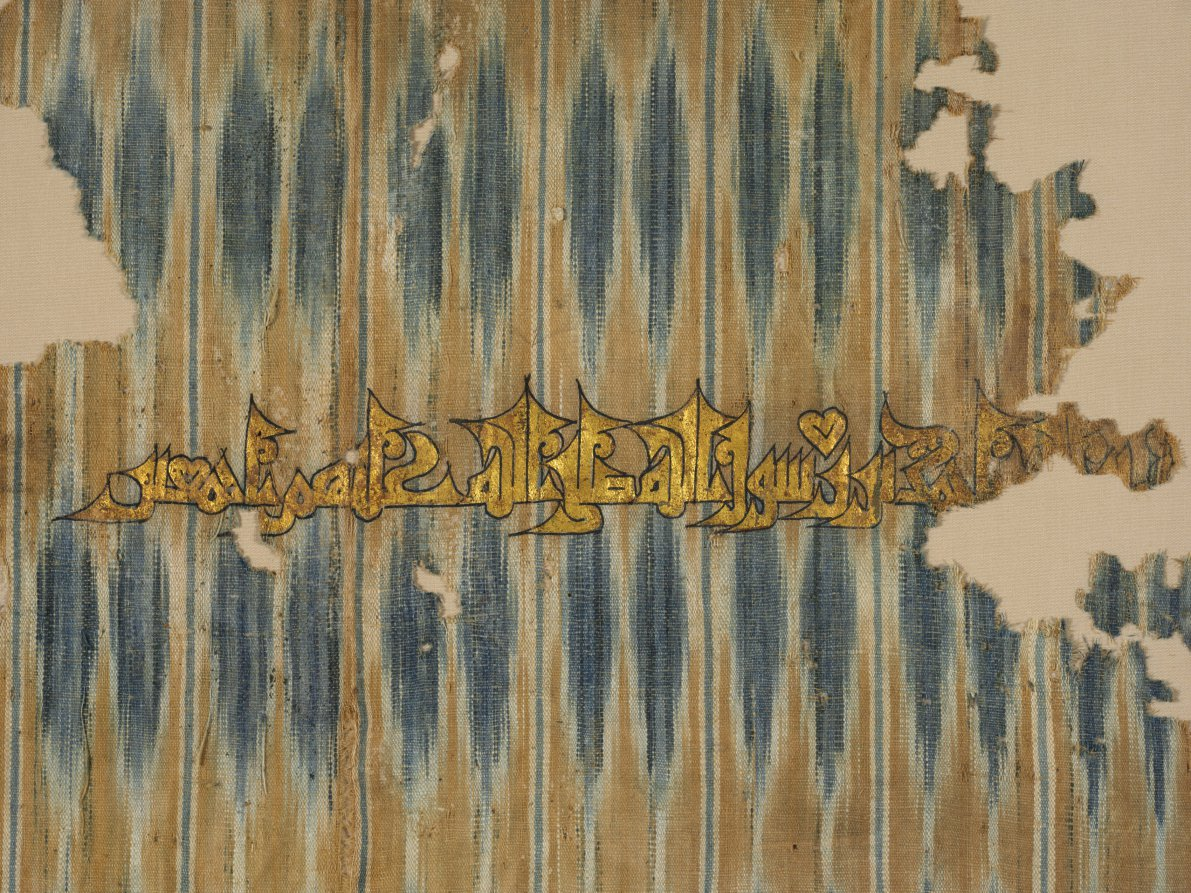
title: Ikat tiraz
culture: Yemen, San'a', Zaydi Imam period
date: 960–80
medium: resist-dyed warp (ikat); plain weave with inscription: cotton and gold leaf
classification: Textile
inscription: Kufic inscription, translated as: ". . . [a]l-Dá'i ilá al-Haqq, Commander of the Believers, Yusuf b. Yahya b. al-Nasir li-Din Allah Ahmad, son of the apostle of God, may God bless them all." At the bottom, the word "to God" is inverted. "Yusuf ibn Yahya" ruled AD 968-998)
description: The "flame" pattern was dyed on the vertical warp threads before weaving began by tightly binding them to resist dye penetration, and repeated for each color. The process and fabric are called ikat, a Malaysian word which may have originated in South Arabia. Yemeni ikats with historical Arabic inscriptions from the 10th century are among the oldest known. This text, written in Kufic script with gold leaf outlined in black, identifies a ruler of the Yemen: ". . . [a]l-Da’i ila al-Haqq, Commander of the Believers, Yusuf b. Yahya b. al-Nasir li-Din Allah Ahmad, son of the apostle of God, may God bless the all." The Arabic phrase "to God" is inverted at the bottom.